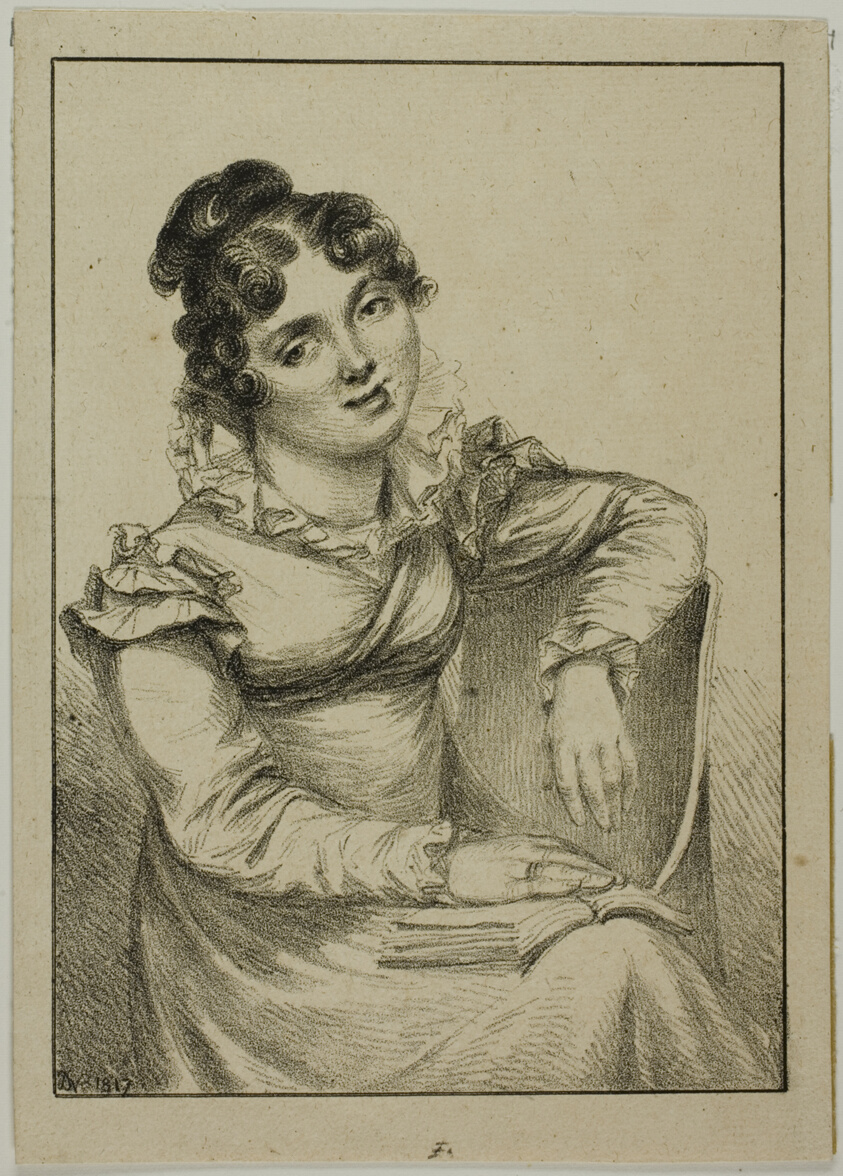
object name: Print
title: Seated Young Woman Holding an Open Book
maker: Dominique-Vivant Denon (French, 1747-1825)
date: 1817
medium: Lithograph in black on cream laid paper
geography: France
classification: lithograph; print; prints and drawing